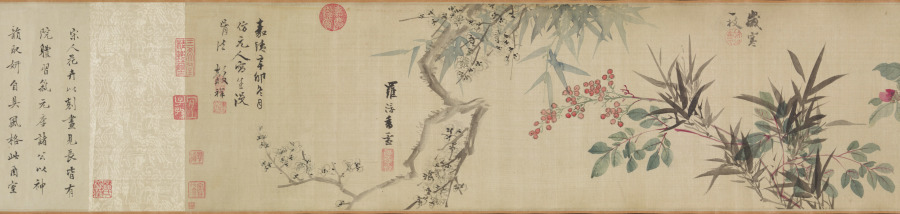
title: Flowers of Four Seasons, with Poems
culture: China, Ming dynasty (1368–1644)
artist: Wang Guxiang (Chinese, 1501–1568)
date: 1531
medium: handscroll; ink and light color on silk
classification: Painting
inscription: Artist's inscription, signature, and 15 seals. Ink Orchids. Sewn as pendants for the man of worth, swaying quiety, fragrance in the valley. [seal] Hsiao-chu ts'un Peony. Wiping his face, the young gentleman Ho [Ho Yen of Wei, Three Kingdoms] appears to have been powdered. His previous life was the perfume-stealing Han Shou [of Chin, 265–419 CE], the fragrance still lingers. [seal] Ts'un-wu chai. Flowering Crab Apple, New Bamboo. Shao-lin [Du Fu, 712–770] had to put down his brush. [Flowering Crab Apple]. Yü-k'o [Wen T'ung, d. 1079) in vain wrote poems about [Bamboo]. [seal] Yu-shih. Lotus Flowers. When she turns her head, half-hidden by a fan, and casts a glance, all the beautiful women become colorless. [seal] K'ang yüeh huai. Loquat. Ripeness in summer. [seal] Lu-chih. Pomegranate Flower. Whenever I remember you I will send my thoughts, but where have you gone--the [skirt] of pomegranate red? [seal] Wu-ho Sheng. Day Lily. Plant the day lily to forget sorrow. [seal] Yu-shih. Chrysanthemum. The untrammelled joy at the eastern fence. [seal] Lu-chih. Begonia. Comparing it to the beauties of Spring, and spreading them out as trimming for the stone steps. [seal] Yu-shih. Hibiscus. In recent years I have always enjoyed looking at flowers; instead of dark red I preferred pink ones. [seal] Jen-sheng i-lou. Narcissus, Camellia. The jade girdle left behind at Lo River. [Narcissus]. The precious pearls glitter before Spring. [Camellia]. [seal] Lu-chih. Heavenly Bamboo (Nandina domestica). A single branch in the wintry season. [seal] K'ang yüeh huai. Plum. Fragrant snow in the Lo-fou Mountains. [seal] Ts'un-wu chai. In the eleventh lunar month of the hsin-mao year of the Jiaqing era [1531], [I] imitated the boneless style of Yüan masters in sketching from life. Guxiang [seals] Yu-shih; Lu-chih. Translated by Wai-kam Ho/Lingyun Shih Liu (1980)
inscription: 2 colophons and 23 additional seals: 1 colophon dated 1632, and 2 seals of Li Jih-hua [Li Rihua] 李日華 (1565–1635); 1 colophon and 2 seals of Xiang Shengmo 項聖謨 (1597–1658); 3 seals of Liang Qingbiao 梁清標 (1620–1691); 6 seals of the Jiaqing 嘉慶 emperor (r. 1796–1820); 9 seals of Ch'eng Ch'i [Cheng Qi] 程琦 (1911–1988)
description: In this painting, flowers are loosely arranged by the seasons: narcissus and peony represent early spring; yellow loquat and lotus, summer; chrysanthemum, autumn; and the plum and evergreen bamboo, winter. The artist added to each flower a poetic line of calligraphy associating each plant with a historic or legendary figure. For example, the chrysanthemum, along with the line “The untrammeled joy at the eastern fence,” refers to the poet Tao Yuanming (died AD 427) who enjoyed chrysanthemums at the eastern fence in his garden. The scroll illustrates Wang Guxiang’s mastery of free brushwork, combining light monochrome ink with transparent colors. In his inscription, Wang says he used the “boneless” style without outlines as developed during the Yuan dynasty (1279–1368). Wang was a native of Changzhou, a city in southeast China known for its rich flora and fauna, and flower-and-bird painting tradition.